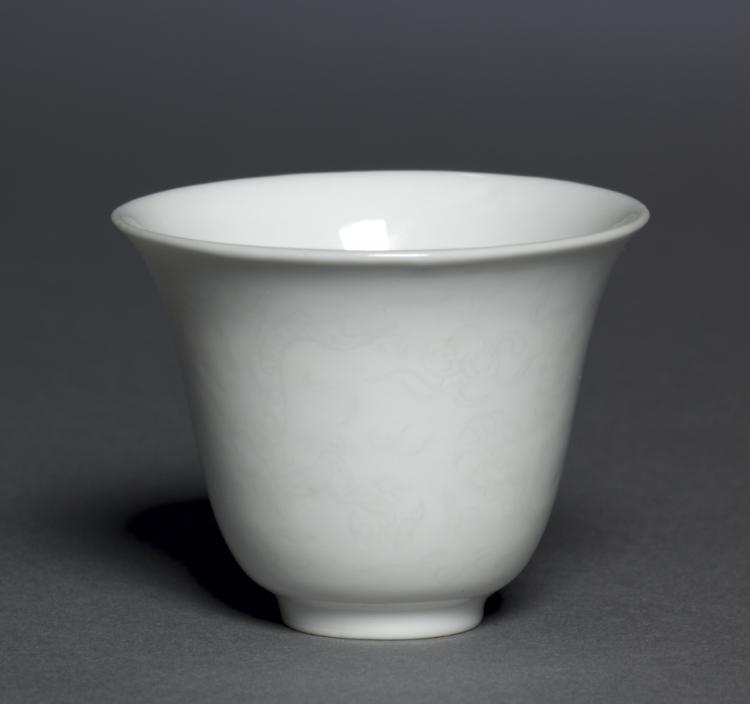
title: Cup with Dragon and Clouds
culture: China, Jiangxi province, Jingdezhen kilns, Ming dynasty (1368-1644), Jiajing mark and reign (1522-66)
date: 1522–66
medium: porcelain with incised decoration and white glaze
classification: Ceramic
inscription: 大明嘉靖年製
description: In the Ming dynasty (1368–1644), luxury items became more affordable to larger parts of the society, including women, merchants, and literati in non-official positions. Imperial patronage and a growing urban population encouraged consumption of luxury goods and local craftmanship. This small white bell-shaped cup illustrates the advanced porcelain techniques and the creative mind of the talented artisan who sought clients on a competitive market.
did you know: This cup is incised with a "secret" decoration of clouds and dragons.